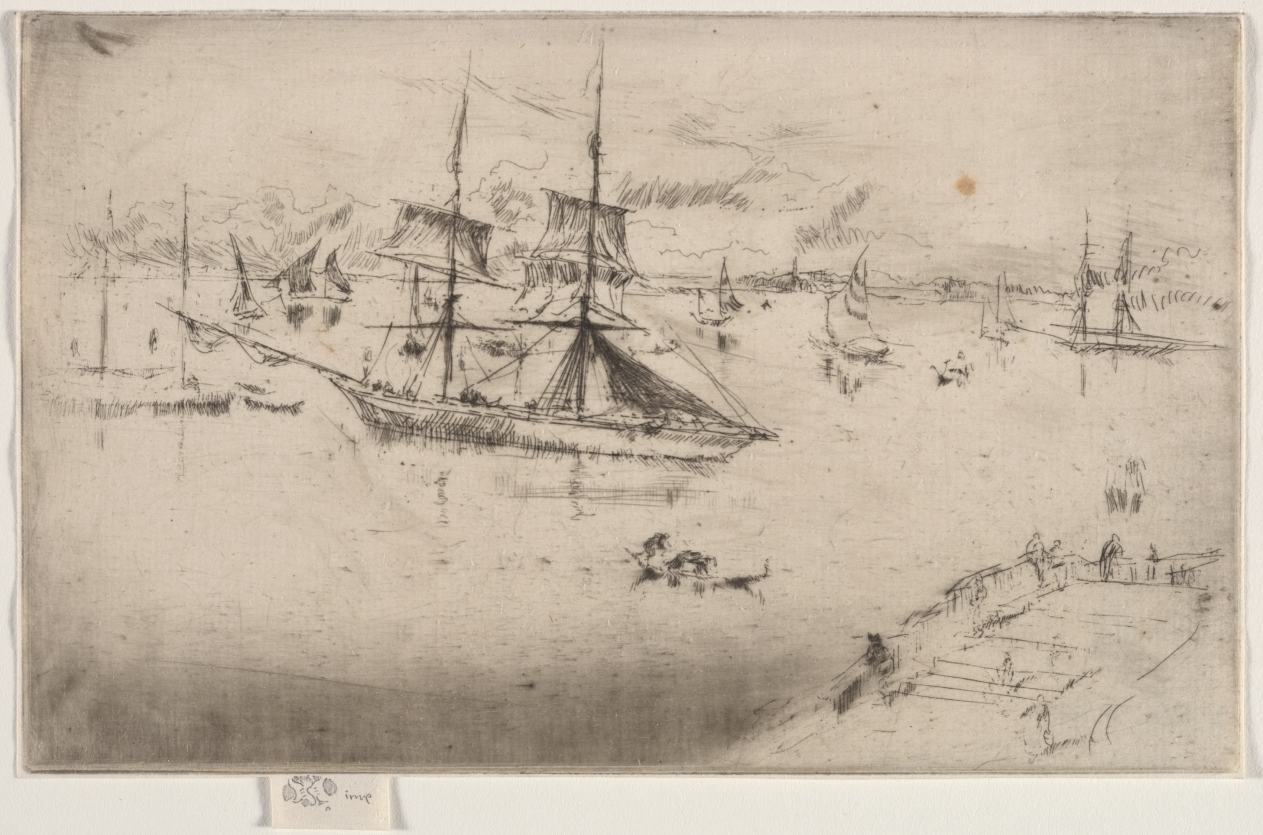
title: Lagoon: Noon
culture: America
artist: James McNeill Whistler (American, 1834–1903)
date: 1886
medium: etching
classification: Print